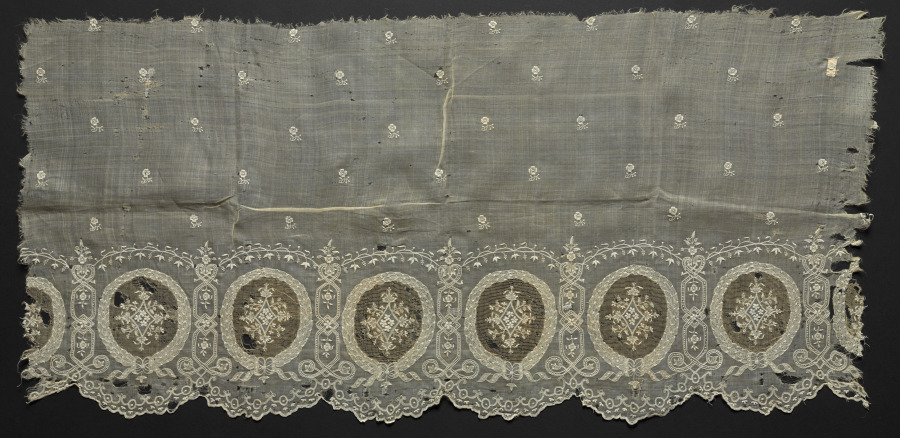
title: Embroidered Textile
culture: Philippines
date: 1800s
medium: Plain weave piña cloth: needle lace and embroidery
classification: Embroidery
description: This rectangular textile is composed of a fine, translucent ground fabric with a scattered pattern of small embroidered floral sprigs. Along the lower edge is a continuous band of oval medallions framed by embroidered scrolling elements, each enclosing a central floral motif executed in calado or another openwork technique. Vertical floral panels separate the medallions, and the edge terminates in a scalloped openwork border.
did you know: This textile may be a fragment from the sleeves of a baro-camisa garment.